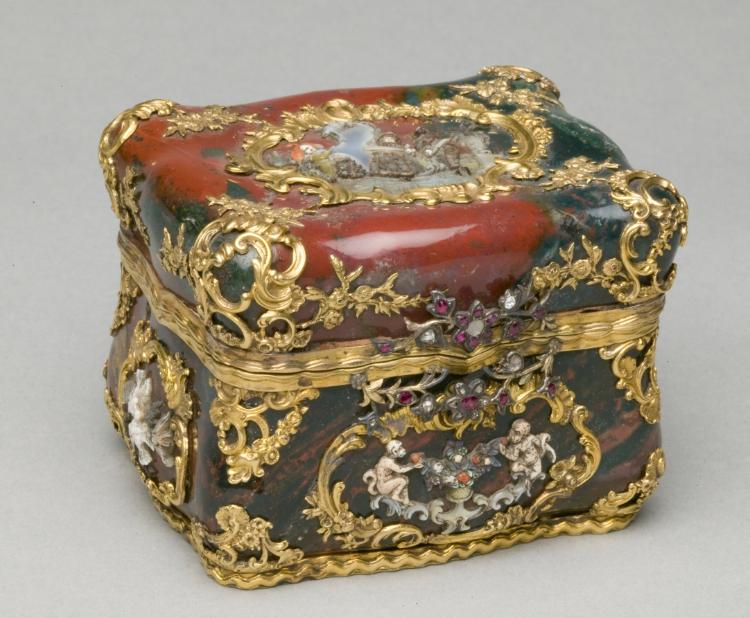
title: Inkstand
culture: Continental, 19th century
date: 1800s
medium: fused red and green glass (?) mounted with gold, pearl, jewels; interior lined with velvet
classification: Miscellaneous